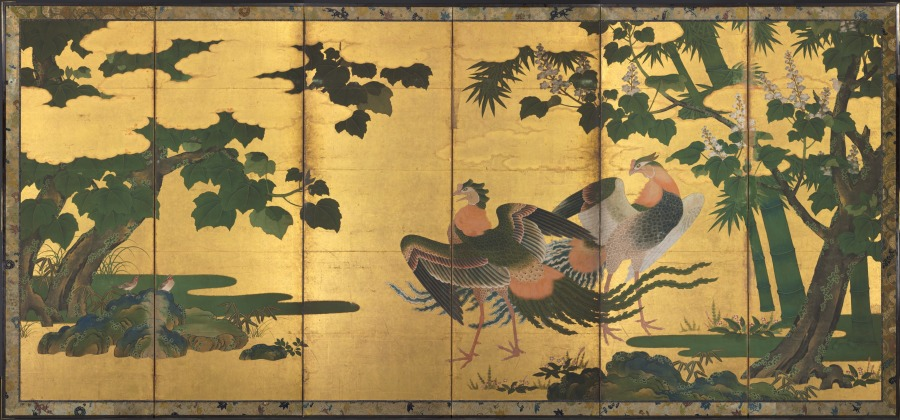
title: Peafowl and Phoenixes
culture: Japan, Momoyama period (1573–1615)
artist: attributed to Tosa Mitsuyoshi (Japanese, 1539–1613)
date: late 1500s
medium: Pair of six-panel screens; ink, color, and gold on gilded paper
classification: Painting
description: Phoenixes are fantastical birds said to inhabit paulownia trees and eat bamboo, and to celebrate virtuous rulers. Peafowl are birds that amuse themselves in the lake of the Buddha Amida’s Pure Land, a paradise where many once hoped to find themselves after death. Both birds appeared on Japanese textiles or paintings in the 1500s and 1600s, used in official ceremonies centered around emperors.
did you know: Members of the Tosa studio of painters once served as heads of the imperial painting bureau.